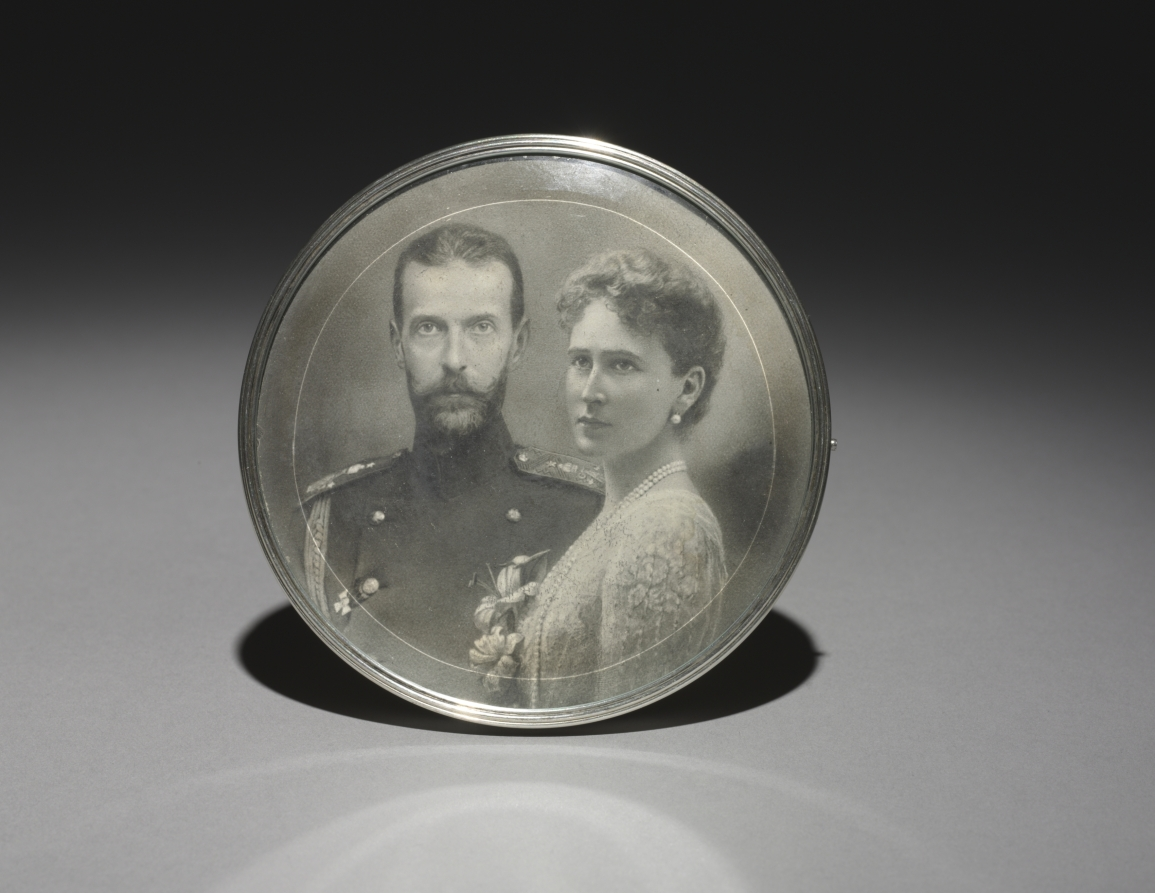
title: Octogonal Frame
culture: Russia, St. Petersburg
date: 1903–1904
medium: silver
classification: Miscellaneous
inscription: inscribed on front: Sergei in Cyrillic with an imperial crown; Elisabeta in Cyrillic with an imperial crown; 1891-1904. In ink on back, C. 15256.